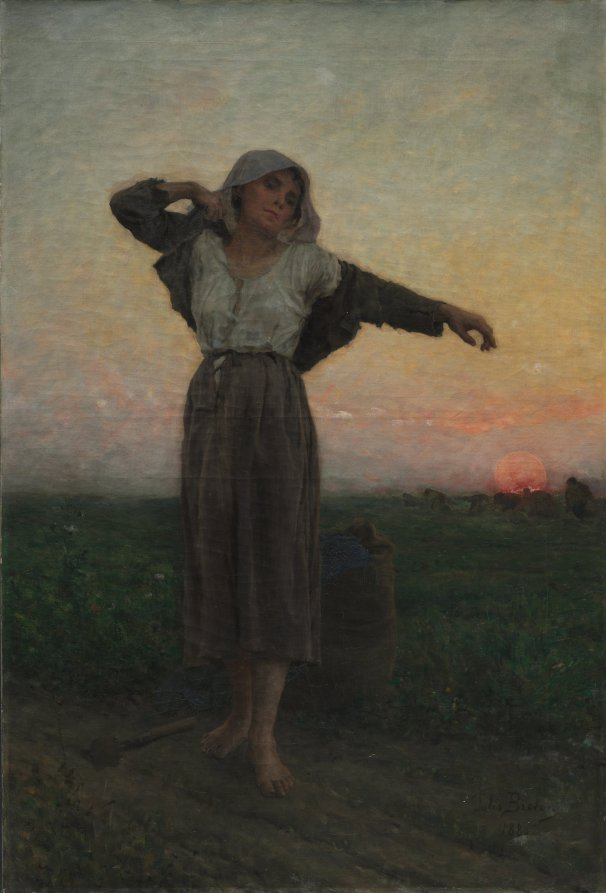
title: The Tired Gleaner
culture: France, 19th century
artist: Jules Breton (French, 1827–1906)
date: 1880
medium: oil on fabric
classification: Painting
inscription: Signed in black paint lower right corner: Jules Breton 1880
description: Gleaning—or picking up what little grain remains after a wheat field has been harvested—was usually the job of the poor, especially women and children. Breton shows a single gleaner stretching against a backdrop of the setting sun, while behind her others still labor in the field. Her bare feet and worn, simple clothing immediately identify her as a peasant. At the same time, however, her expansive gesture and the subdued tones of her skin and clothes link her to the surrounding landscape, both visually and symbolically. This painting not only suggests the hardships of peasant life, but also the grand link between humanity and the land. Like many of his successful contemporaries, Breton met demand for his paintings by copying and making variations of his own works. This picture is similar to a larger, more famous painting that was exhibited in the Paris Salon of 1880. The Cleveland collector Hinman H. Hurlbut, who bought this canvas from the artist, probably commissioned Breton to make this smaller variation of the larger painting.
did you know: Breton felt a sense of connection with peasant life, growing up in a small village of rural workers; however, his father's standing as a property manager to a duke allowed Breton to receive a classical arts education.